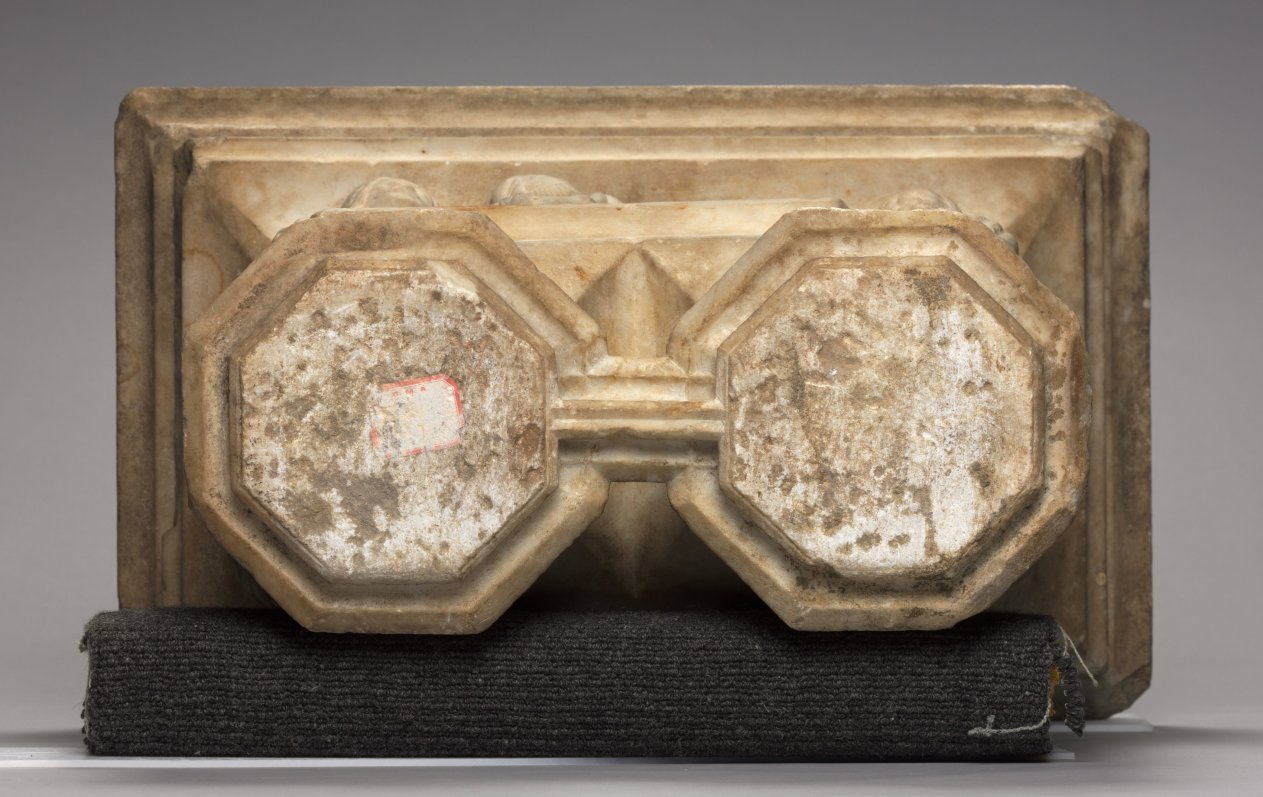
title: Engaged Capital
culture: Southern France, Abbey of Larreule, near Tarbes, 15th century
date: 1400s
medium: limestone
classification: Sculpture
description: This capital belongs to a surviving group including other architectural fragments that once decorated the cloister of the Abbey of Larreule. A cloister was a covered walkway or arcade, usually around all four sides of a square area of grass (the "cloister garth"). The seclusion of the cloister was the monks’ exclusive domain, off limits to others. Here, the monks were supposed to pray, study, meditate, and exercise in privacy and solitude. Such cloister capitals served both to instruct the monks and as a focus for their devotions. Other capitals in this series are installed in the Jardin Massey at Tarbes, near the original abbey. An arch from Larreule has been assembled with other associated French capitals at The Cloisters in New York.